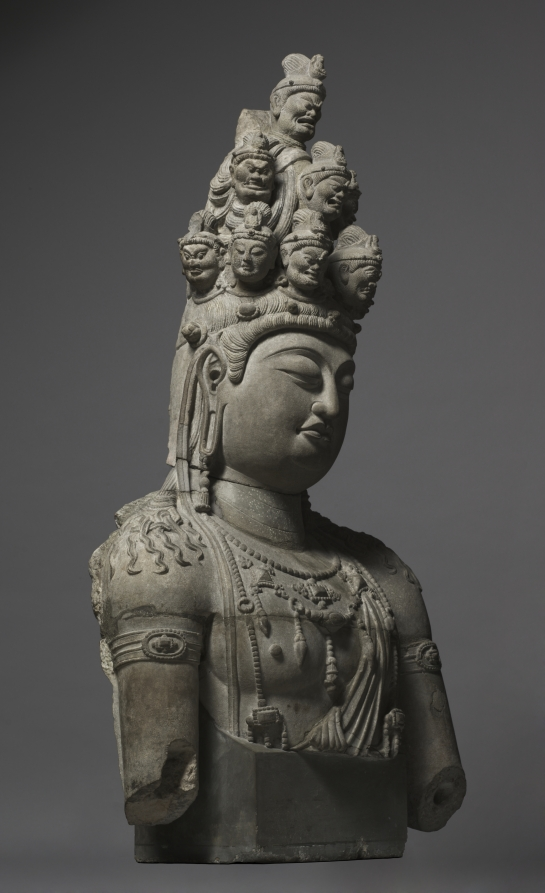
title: Eleven-Headed Guanyin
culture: China, Tang dynasty (618-907)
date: early 700s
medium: gray sandstone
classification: Sculpture